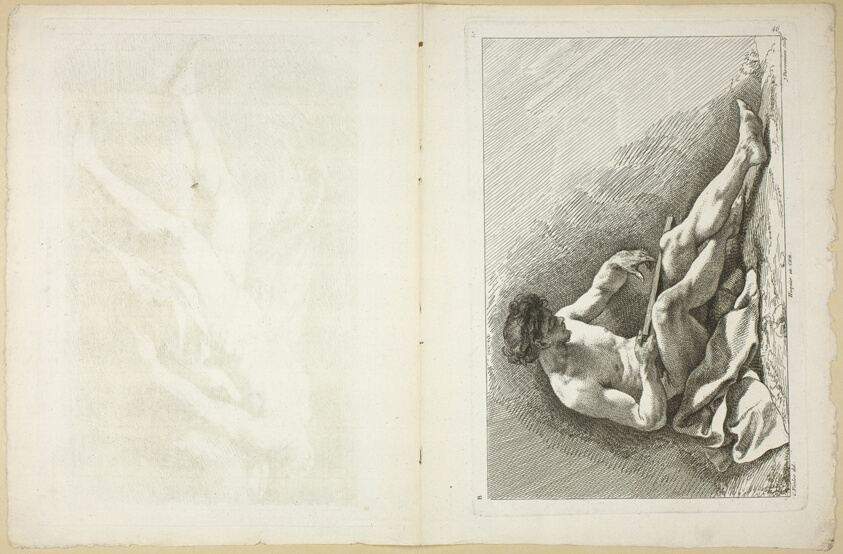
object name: Print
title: Page 46 and Page 47, from Seconde Livre de Figures d’Académies Gravées en Partie par les Professeurs de l’Académie Royale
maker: Jean-Baptiste Perronneau (French, 1715-1783); after Carle van Loo (French, 1705-1765); Pierre Charles Trémolières (French, 1703-1739); printed by Gabriel Huquier (French, 1695-1772); published by Charles-Antoine Jombert (French, 1712-1784)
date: published 1745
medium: Etching on ivory laid paper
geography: France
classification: etching; print; prints and drawing